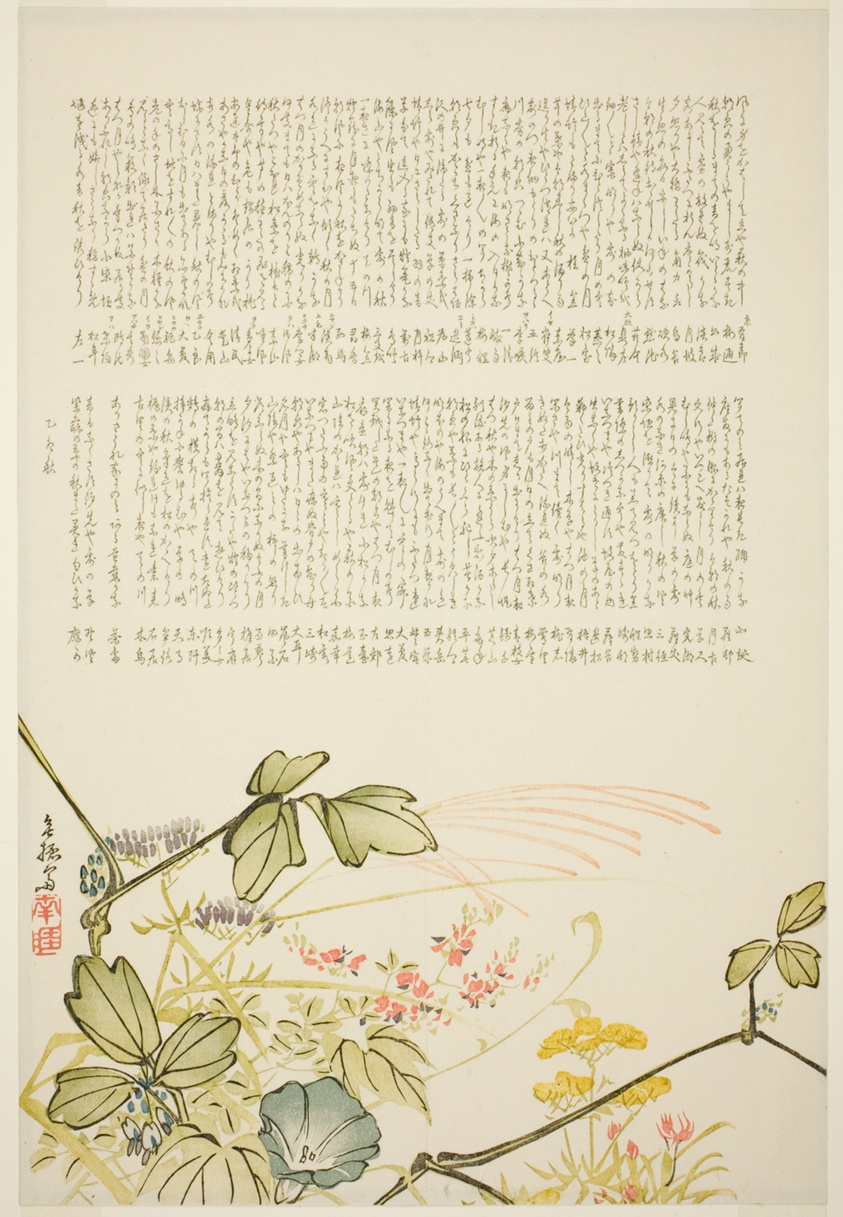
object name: Print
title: Autumn Grasses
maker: Nangai, Tanaka; Japanese, active mod 19th century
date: 1855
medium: Color woodblock print, surimono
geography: Japan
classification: print; asian art